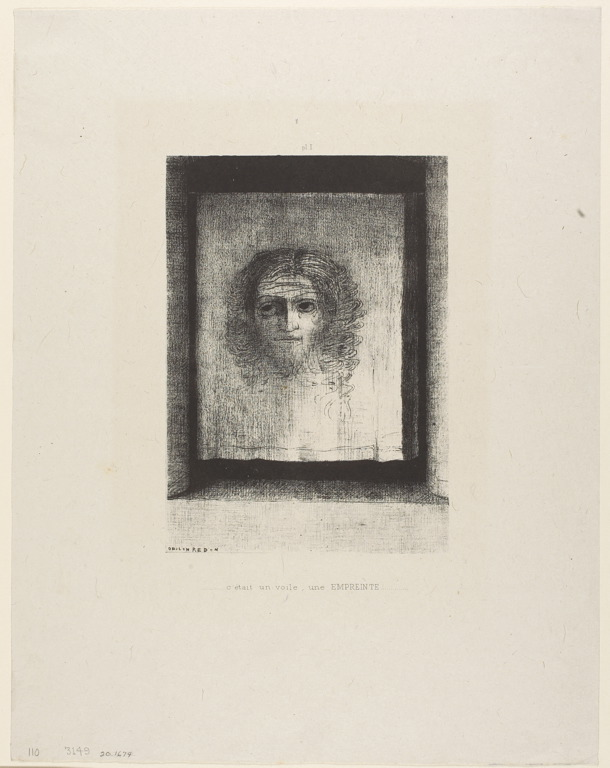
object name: Print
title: It was a Veil, an Imprint, plate 1 of 6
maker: Odilon Redon (French, 1840-1916)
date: 1891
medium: Lithograph in black on light gray chine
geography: France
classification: lithograph; print; prints and drawing; paper